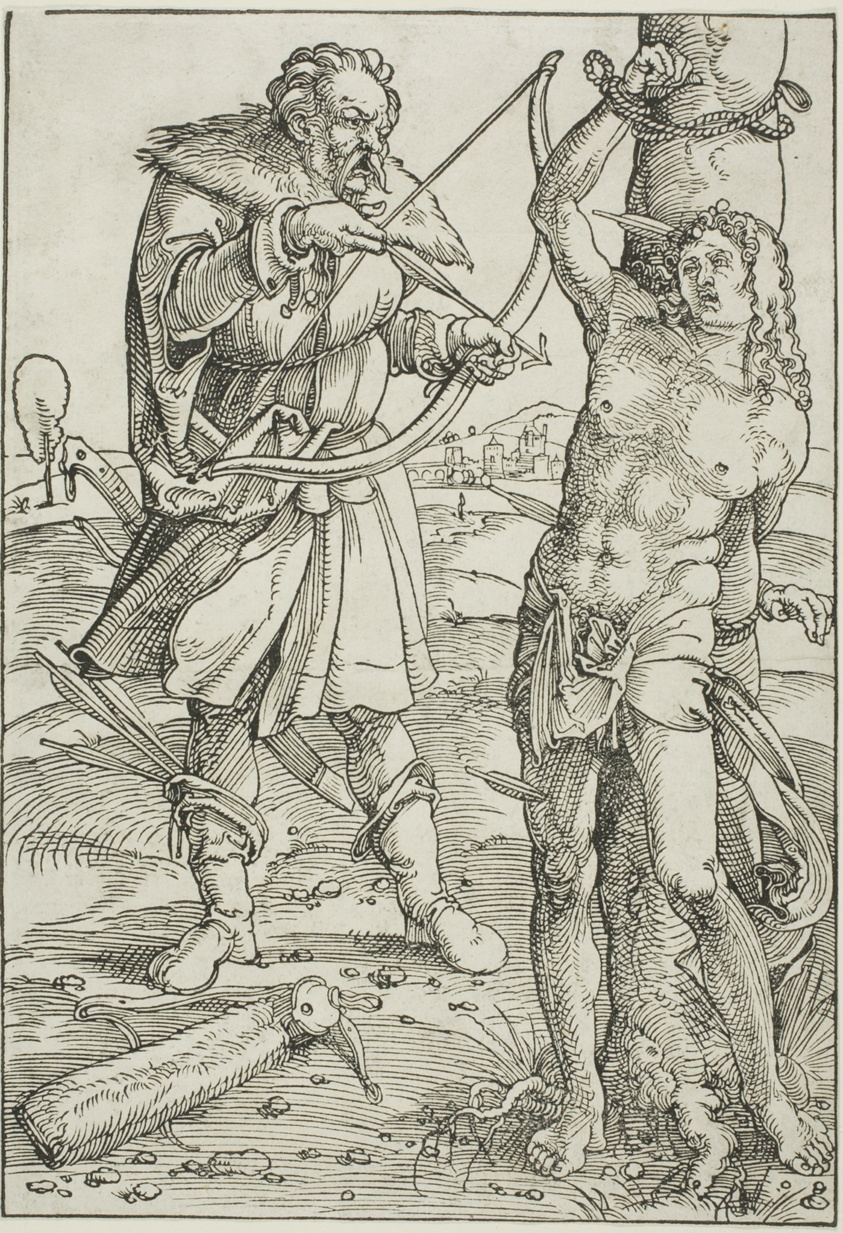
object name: Print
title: The Martyrdom of Saint Sebastian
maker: Hans Baldung Grien (German, 1484/85-1545)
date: 1505/07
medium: Woodcut in black on ivory laid paper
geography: Germany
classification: woodcut; print; prints and drawing